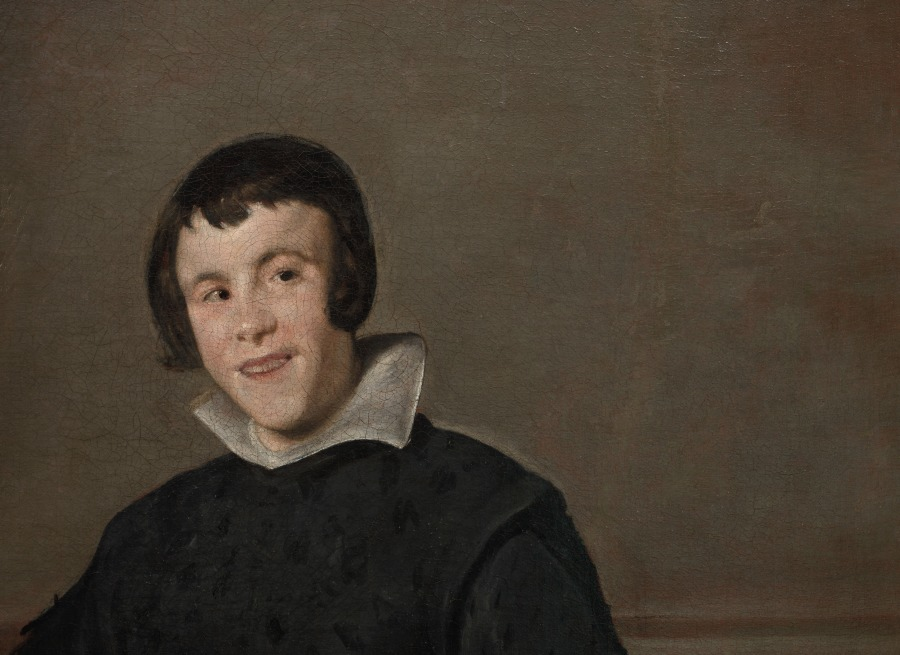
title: Portrait of the Jester Calabazas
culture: Spain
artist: Diego Velázquez (Spanish, 1599–1660)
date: c. 1631–32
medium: oil on canvas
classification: Painting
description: Calabazas, a jester in the court of King Philip IV of Spain, had physical and mental disabilities, a state that the artist emphasizes, rather than tries to hide. While the Spanish court prized and doted upon people with disabilities such as Calabazas, Velázquez transformed their depiction in portraiture. This startling work uses the format of the formal, full-length court portrait to present a type of person who was generally perceived as marginal at this point in history and profoundly humanizes him.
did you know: Calabazas holds a wind-driven pinwheel and a miniature portrait of a woman, together suggesting the inconstancy of love.